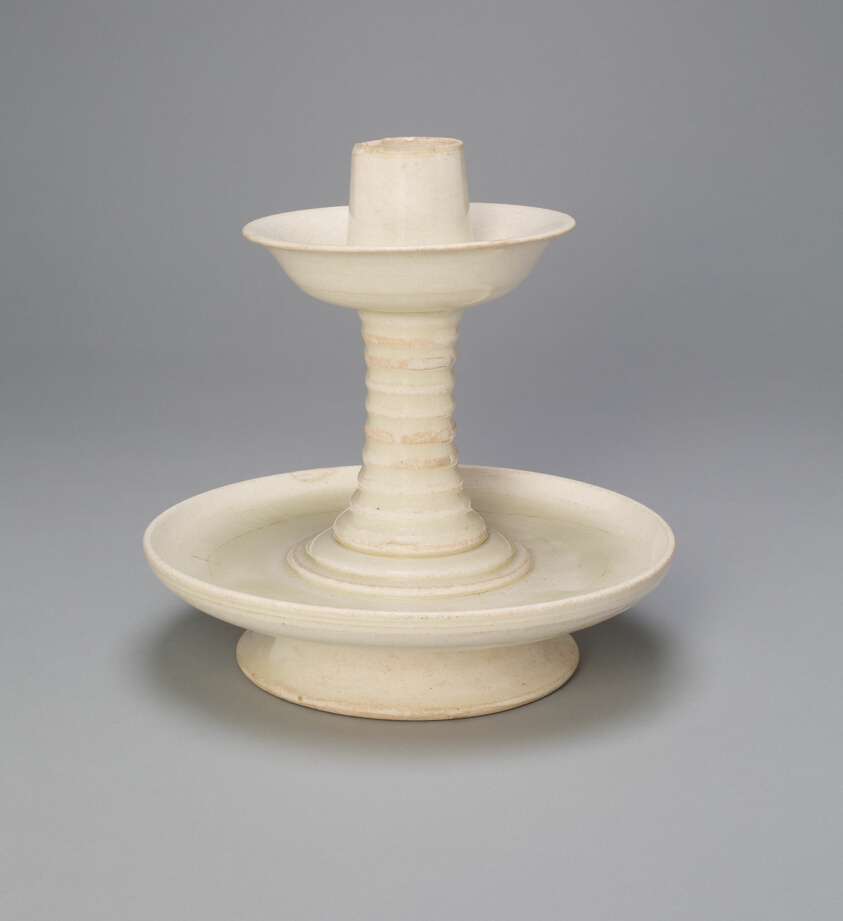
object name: Vessel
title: Dish-Shaped Candlestand with Long, Ribbed Neck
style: Chinese (culture or style)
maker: China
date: Sui (581–618) or Tang dynasty (618–907), early 7th century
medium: Glazed stoneware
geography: China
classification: candleholder; stoneware; candleholder - candlestick; ceramics; asian art; vessel